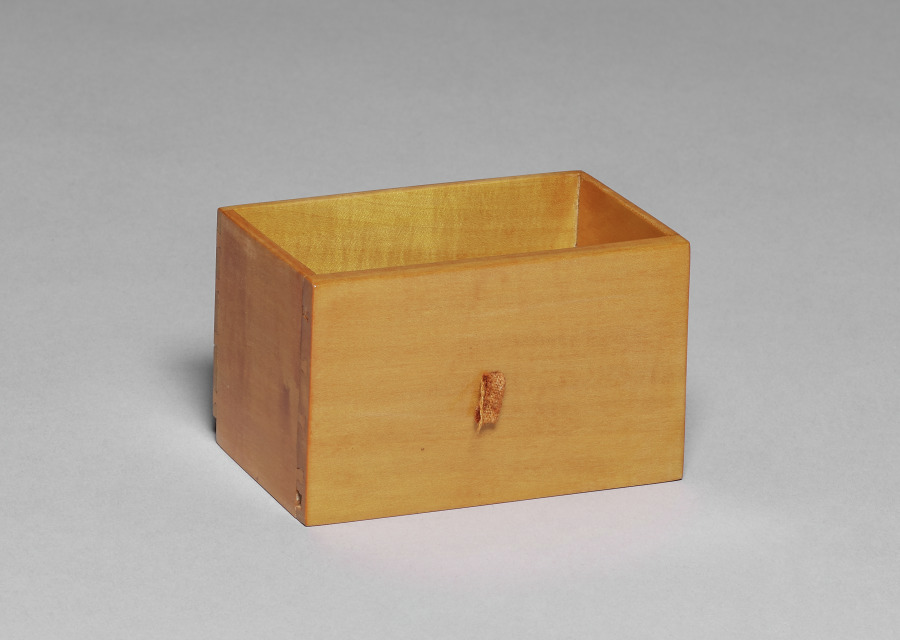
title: Concealed Drawer for a Globe Sewing Table (Globustisch)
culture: Austria, Vienna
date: c. 1800–1810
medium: Burl walnut veneer, mahogany, ebony, satinwood, gilt wood, painted wood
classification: Furniture and woodwork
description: Work tables resembling globes were the usual form for a lady's sewing or writing table around 1800 in Austria. Combining moving parts, secret compartments, and highly finished decoration, these tables were also a way for the cabinetmaker to show off his skill. The tripod supports and temple-like architectural quality of both the exterior and interior decoration reflect the fashionable taste for neoclassical style, or Biedermeier as it was called in Austria, where Vienna was the center of such elaborate furniture production.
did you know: The top half of the globe rotates upward to reveal hidden compartments for sewing tools, threads, and unfinished fabric pieces.